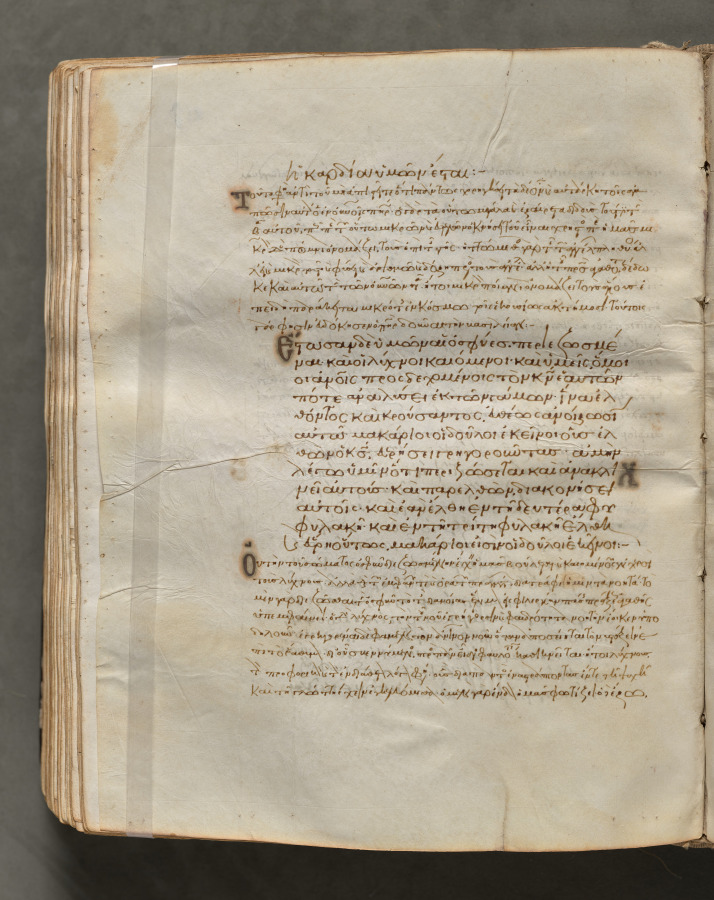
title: Text, folio 268 (verso), from a Gospel Book with Commentaries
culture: Byzantium, Constantinople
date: c. 1000–1100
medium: ink, tempera, and gold on vellum; leather binding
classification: Bound Volume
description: Each of the four gospels in this book opens on a page with brilliantly illuminated borders depicting the author of the text as well as birds—principally peacocks, symbols of the immortality of the soul—and fountains, representing the fountain of life and the salvation of the soul. This volume consists of 428 leaves with texts in Greek. Its level of sophistication suggests that it was probably written and decorated in a monastery in Constantinople.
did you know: Gospel books were carried in procession through Byzantine churches.